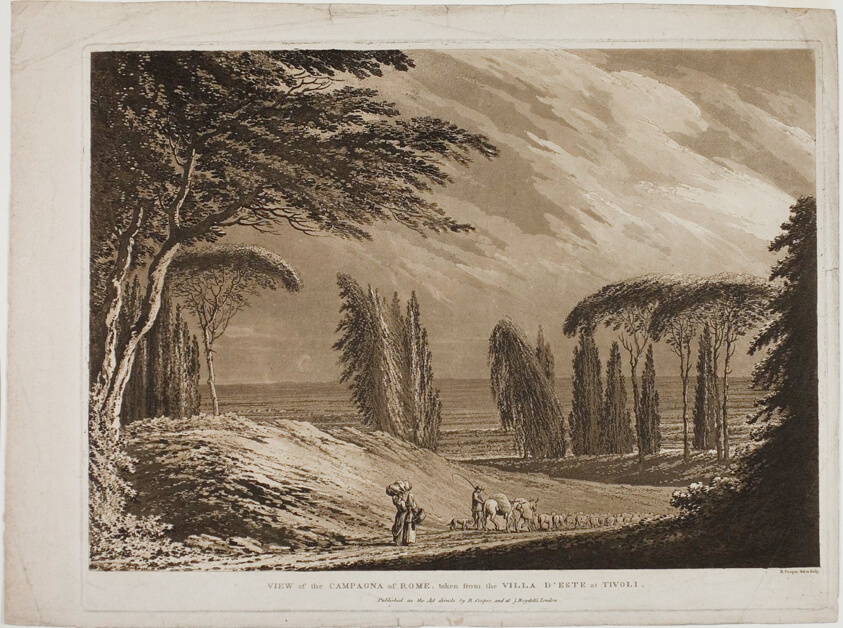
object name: Print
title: View of the Campagna of Rome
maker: Richard Cooper II; English, born Scotland, 1740-1822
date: 1778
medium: Etching and aquatint printed in dark brown ink on ivory laid paper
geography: Scotland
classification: etching; print; prints and drawing